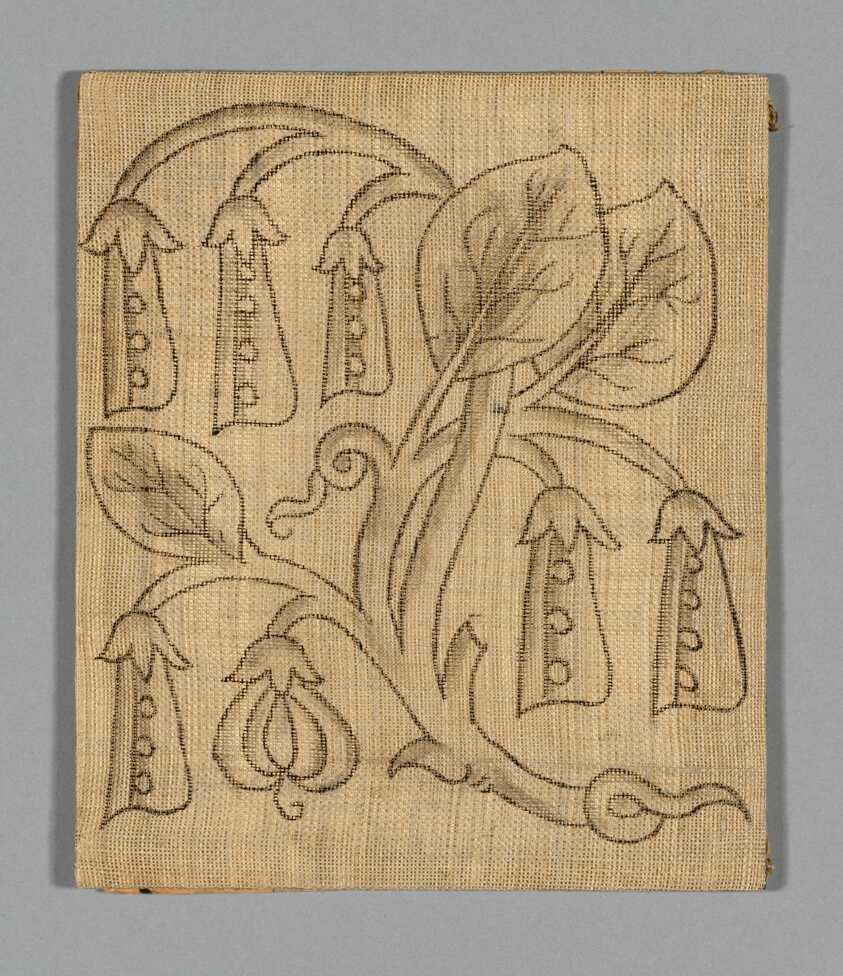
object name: Textile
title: Slip (Unfinished)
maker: England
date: 1590/1640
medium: Linen, plain weave with drawing in pencil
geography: England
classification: textile; patterns (guides); needlework (visual works); accessories (object genre)